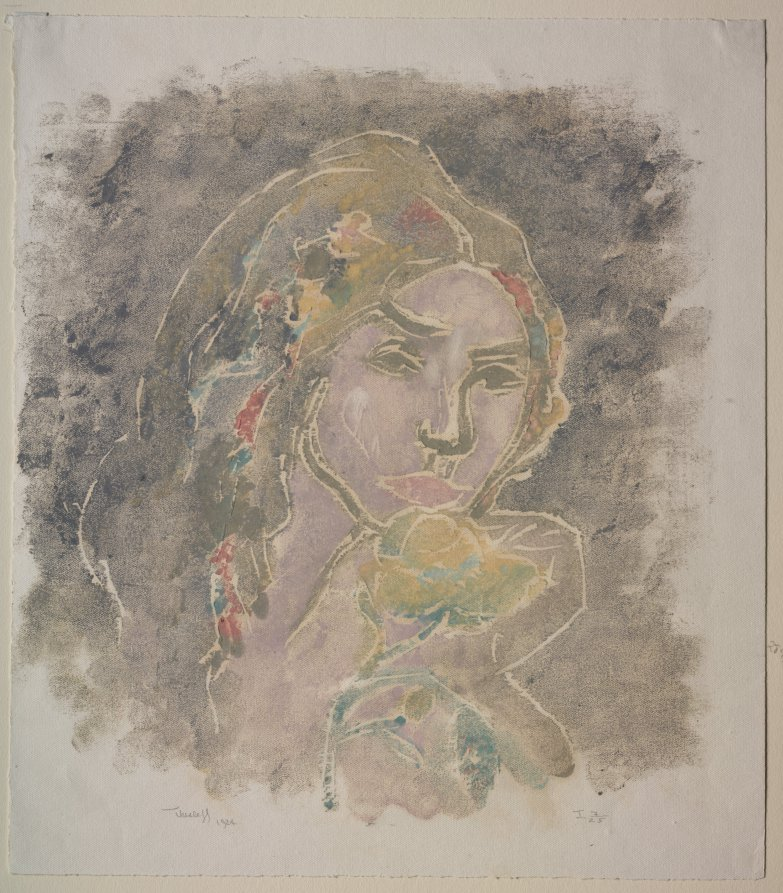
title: Girl's Head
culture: Finland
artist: Ellen Thesleff (Finnish, 1869–1954)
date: 1924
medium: color woodcut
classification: Print